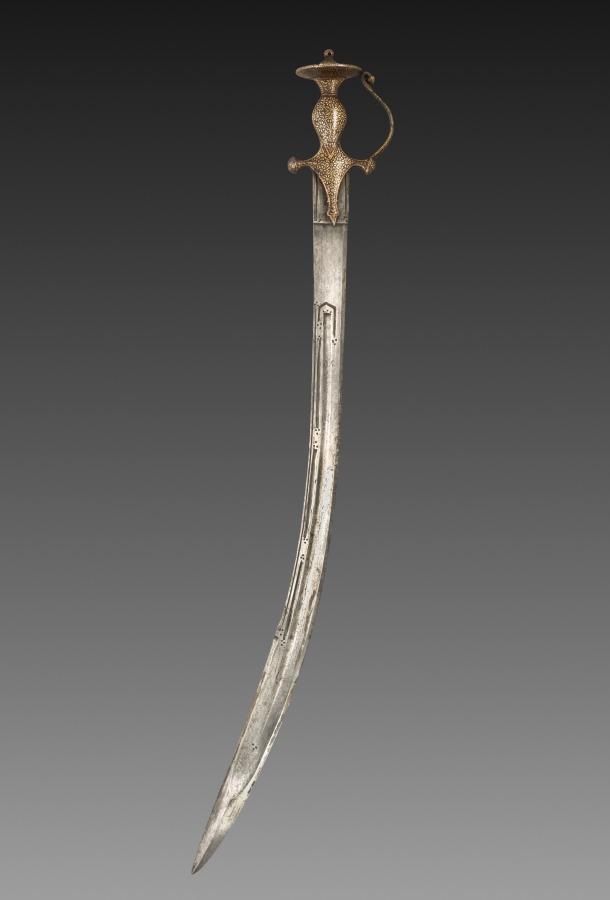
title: Tulwar sword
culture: India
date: before 1919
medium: iron with gold inlay; steel blade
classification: Arms and Armor